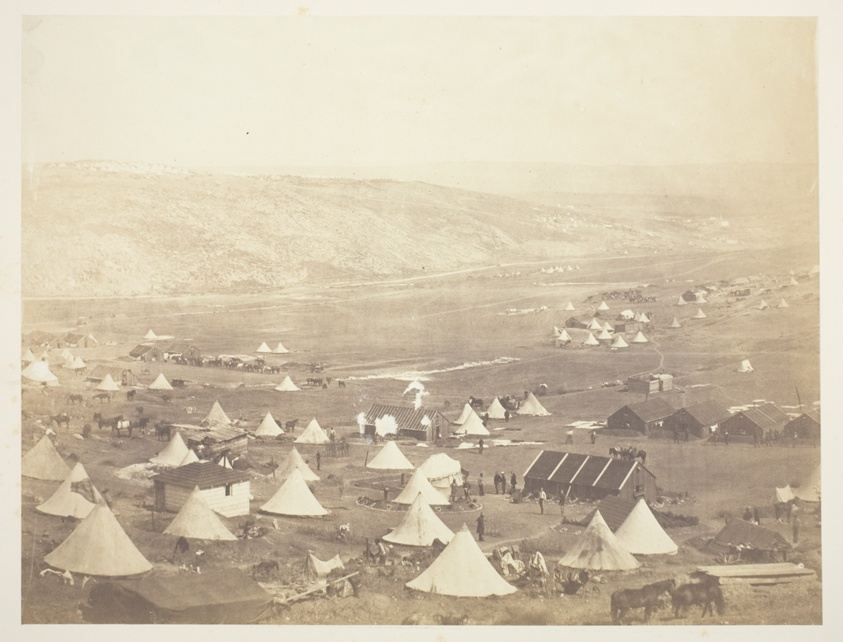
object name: Photograph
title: Cavalry Camp, looking towards Kadikoi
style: 19th century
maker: Roger Fenton (English, 1819–1869)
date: 1855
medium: Salted paper print, from the album "Photographic Pictures of the Seat of War in the Crimea" (1856)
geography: England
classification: salted paper print; photographic process; photography; photograph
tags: Collected by Hugh Edwards, documentary